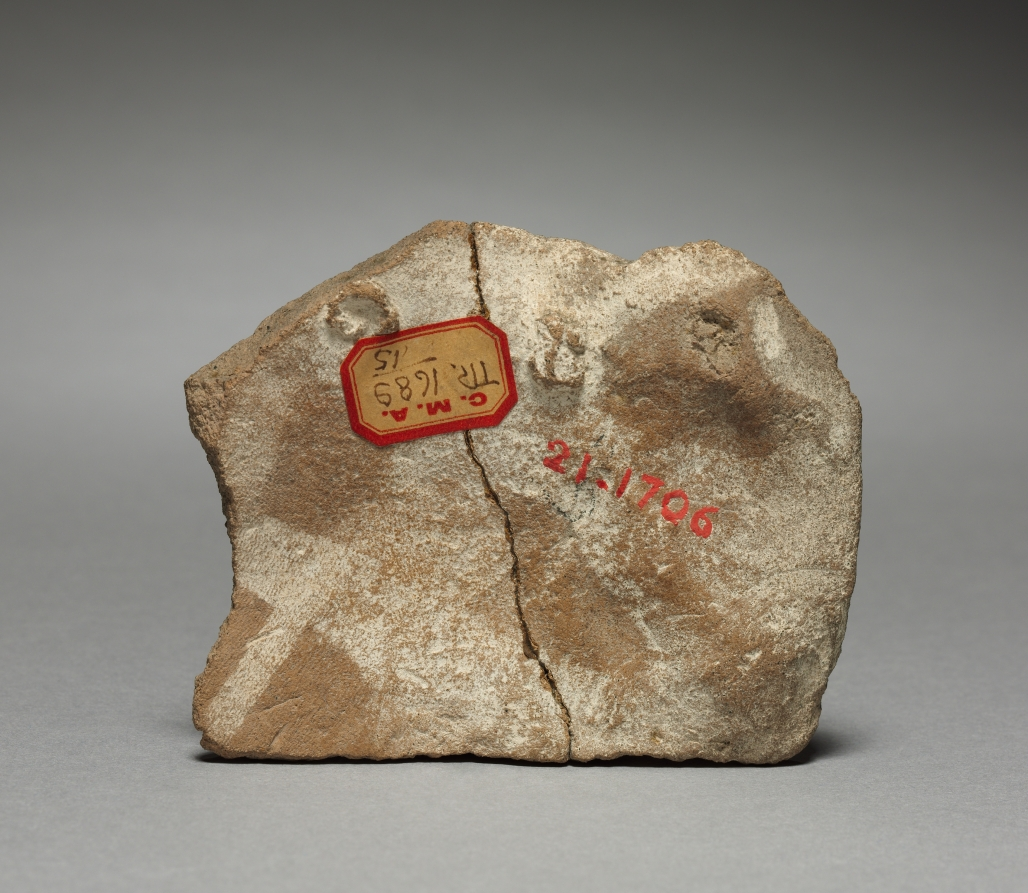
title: Head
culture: Mexico, Teotihuacan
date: 1–750 CE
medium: pottery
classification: Ceramic